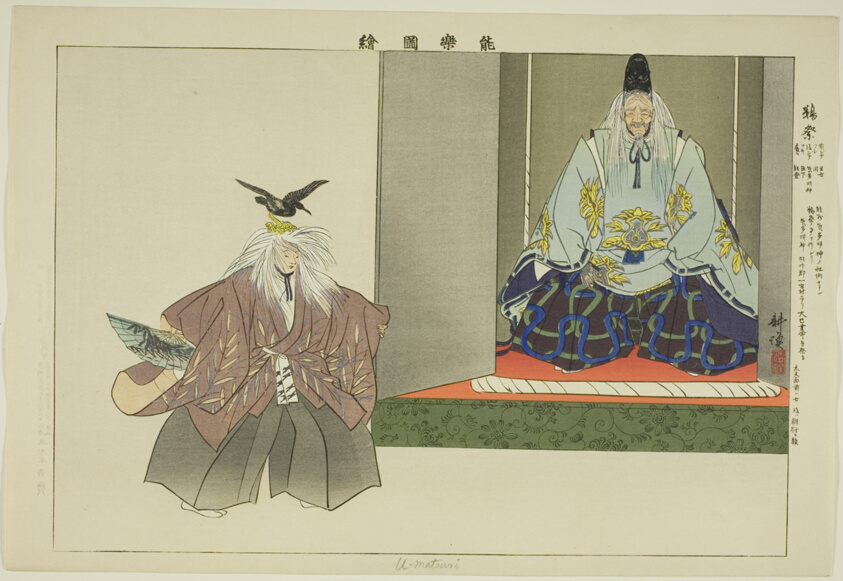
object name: Print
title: U no Matsuri, from the series "Pictures of No Performances (Nogaku Zue)"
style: Japanese (culture or style)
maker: Tsukioka Kogyo; Japanese, 1869-1927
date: 1898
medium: Color woodblock print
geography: Japan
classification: woodblock print; print; asian art